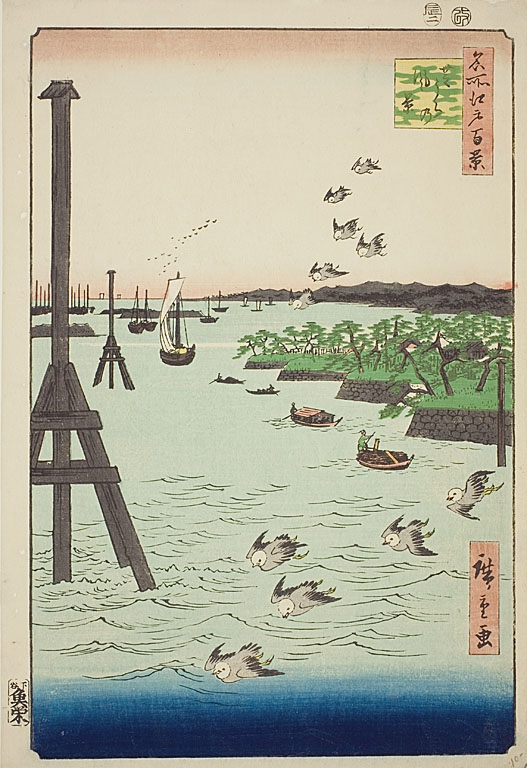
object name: Print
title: View of Shiba Coast (Shibaura no kei), with very light and dark blue water, No.108 from the series One Hundred Famous Views of Edo (Meisho Edo hyakkei)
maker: Utagawa Hiroshige (Japanese, 1797-1858)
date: 1856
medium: Color woodblock print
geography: Japan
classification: woodblock print; print; asian art